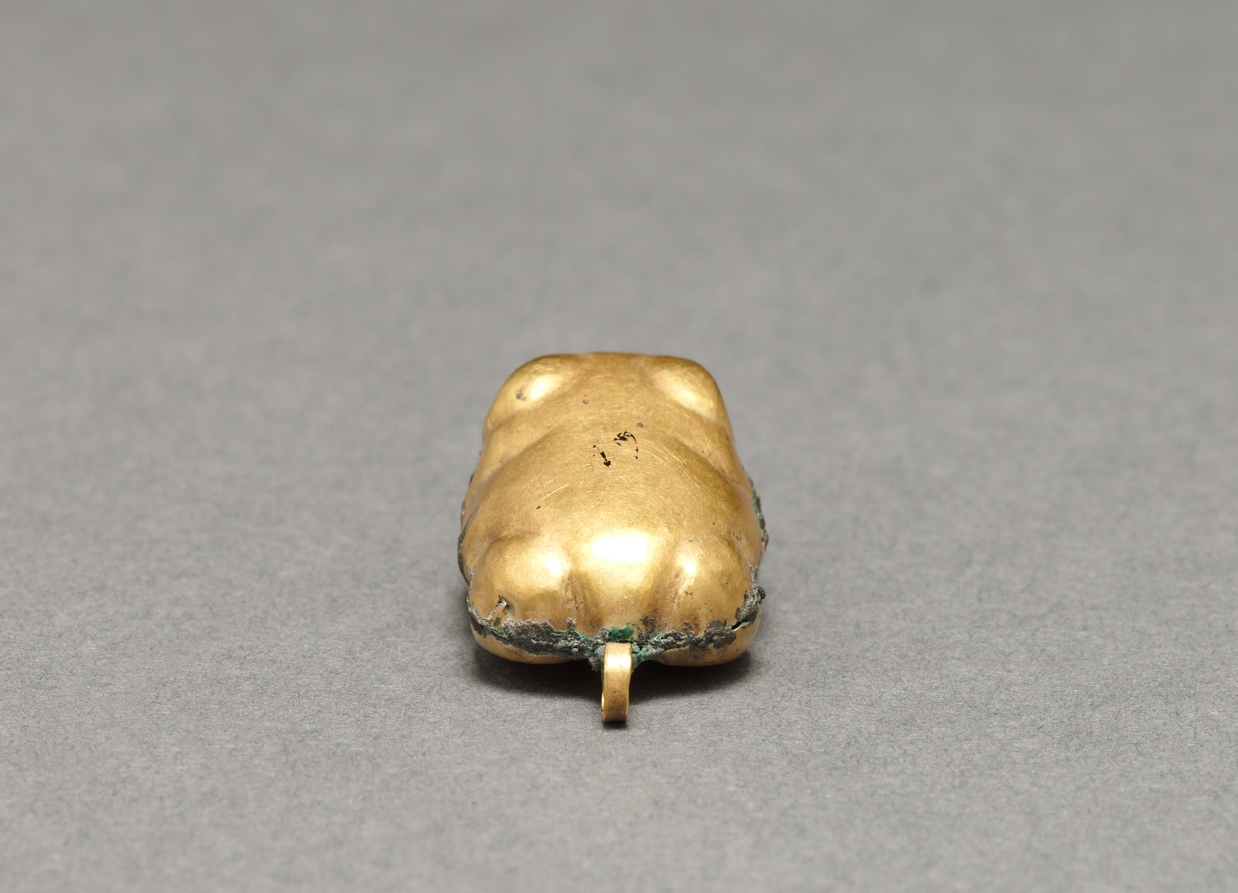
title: Frog Pendant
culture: Peru, Moche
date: 200–700 CE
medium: gold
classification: Metalwork